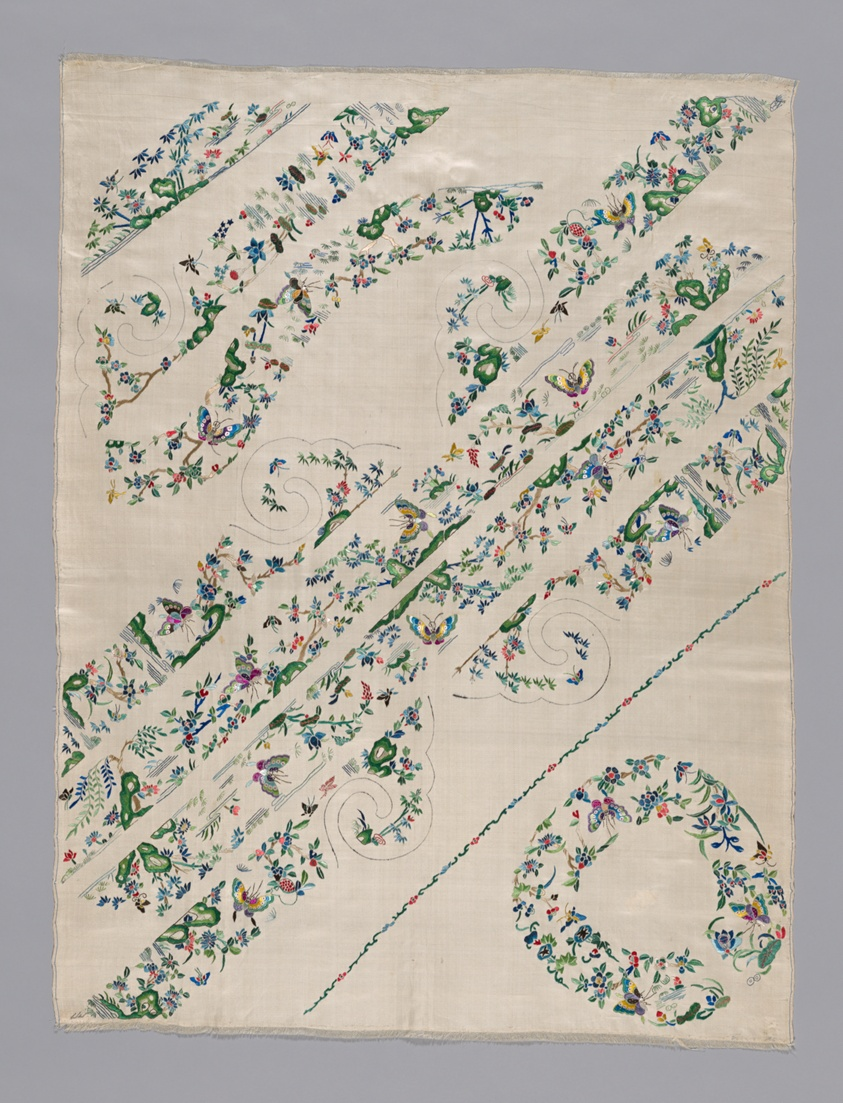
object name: Costume and Accessories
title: Embroidered Trimmings for a Woman's Ao (Short Coat)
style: han (chinese), East Asian, asian, Chinese (culture or style), qing, 19th century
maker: Han-Chinese (China)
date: Qing dynasty (1644–1911), 1875–1900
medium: Silk, warp-float faced 7:1 satin weave; ink outlines; embroidered in back, cross, eyelet, fly, knot, single satin, satin, split, and stem stitches; couching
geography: China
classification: costume - embroidery; needlework (visual works); textile; garment; clothing; coat (garment); costume - needlework; costume accessory worn above the waist; costume component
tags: floral motifs, landscape, butterflies, floral, fashion, trees, rocks